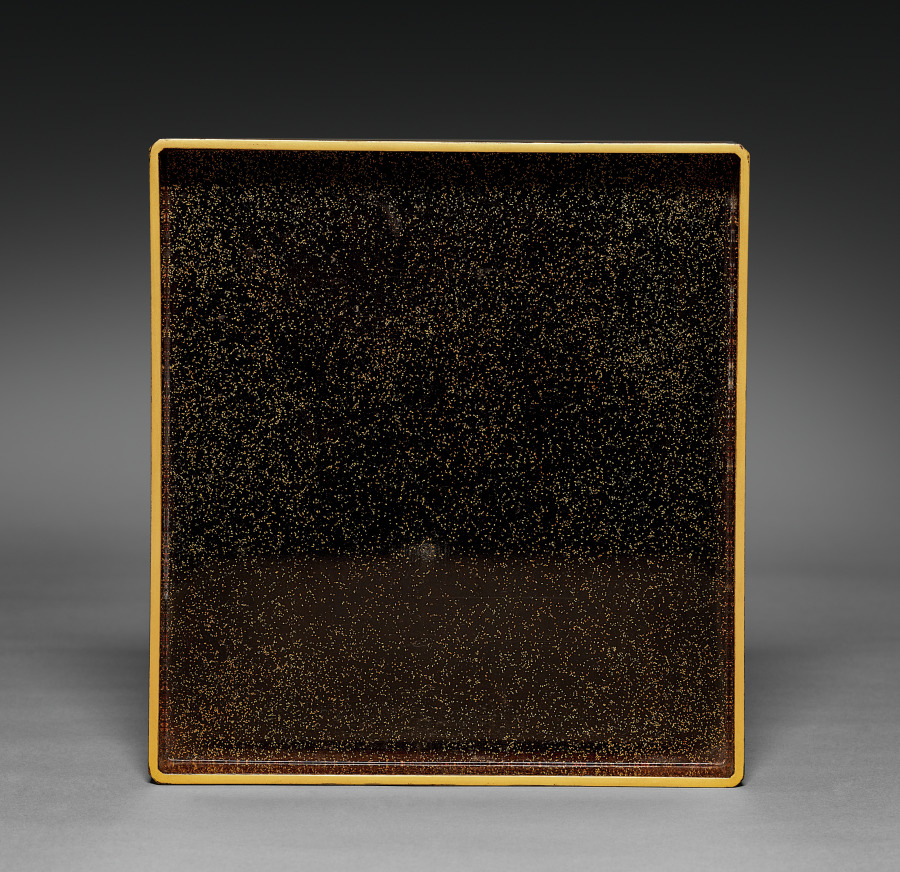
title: Writing Box with Spitting Courtesan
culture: Japan, Edo period (1615–1868)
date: early to mid-1800s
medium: Lacquered wood with maki-e (image made of sprinkled gold dust)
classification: Lacquer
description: The design on this writing box shows a courtesan who has just completed an impressive feat of spitting the term shinobukoi (忍恋), which could be translated as “hidden love” or “unrequited love,” on an earthen wall. The phrase appeared in classical Japanese poetry anthologies produced by nobles writing in ink on the finest decorated papers. Here, the confining walls of the brothel district become a space for public announcement in graffiti, with the medium being perhaps tea.